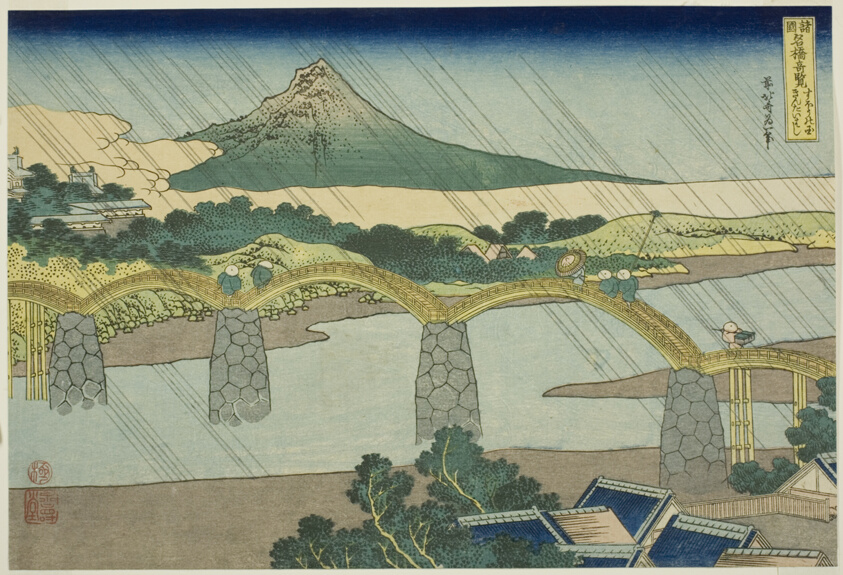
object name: Print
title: Kintai Bridge in Suo Province (Suo no kuni Kintaibashi), from the series "Unusual Views of Famous Bridges in Various Provinces (Shokoku meikyo kiran)"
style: Japanese (culture or style)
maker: Katsushika Hokusai 葛飾 北斎; Japanese, 1760-1849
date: c. 1833/34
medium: Color woodblock print; oban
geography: Japan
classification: woodblock print; print; asian art